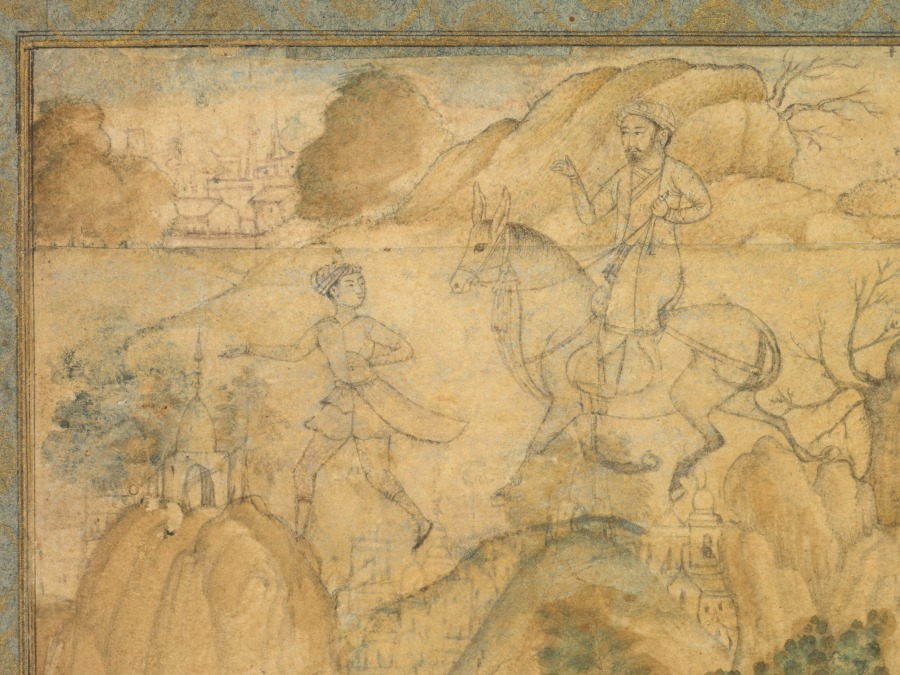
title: A Prince Visiting a Holy Man in a Rocky Landscape (recto)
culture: India, Mughal, 16th century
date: c. 1590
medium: Gum tempera, ink, and gold on paper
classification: Painting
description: A recurring theme in the art of India is the relationship between rulers and the religious practitioners who were believed to control supernatural forces that would aid in the success of rule and war. A prince has come to the abode of a Sufi mystic dervish, who sits with two acolytes in front of a rocky cave that may be his dwelling. The dervish appears to be blessing the prince and the weapons carried by his retinue to help assure success in an upcoming battle. In the foreground, a princely figure leading a horse meets surreptitiously with an eccentric figure holding a squat vessel, possibly filled with a narcotic substance such as bhang, used by many groups of mystics to aid in reaching trance states.